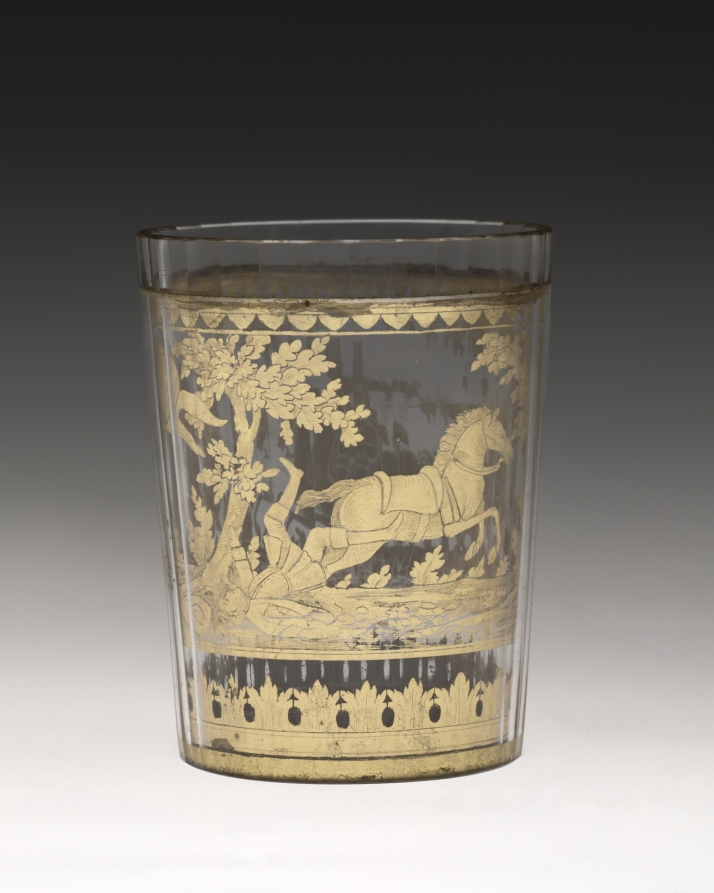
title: Tumbler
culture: Bohemia, 18th century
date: c. 1730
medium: zwischengoldglas (glass)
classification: Glass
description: Small beakers, or tumblers, were used to drink various types of spirits, cordials, and fortified wines, like sherry and port. “Gold between glass” (Zwischengoldglas) was a labor-intensive and costly technique practiced in Bohemia (present-day Czech Republic) and Austria in the 1700s. A gold-leaf design was affixed between two glass vessels that were then precisely fit together and fused. In this example, the gold leaf portrays a boisterous hunting scene. When the glass is tipped and emptied, the interior reveals that two hunting dogs have killed a hare.